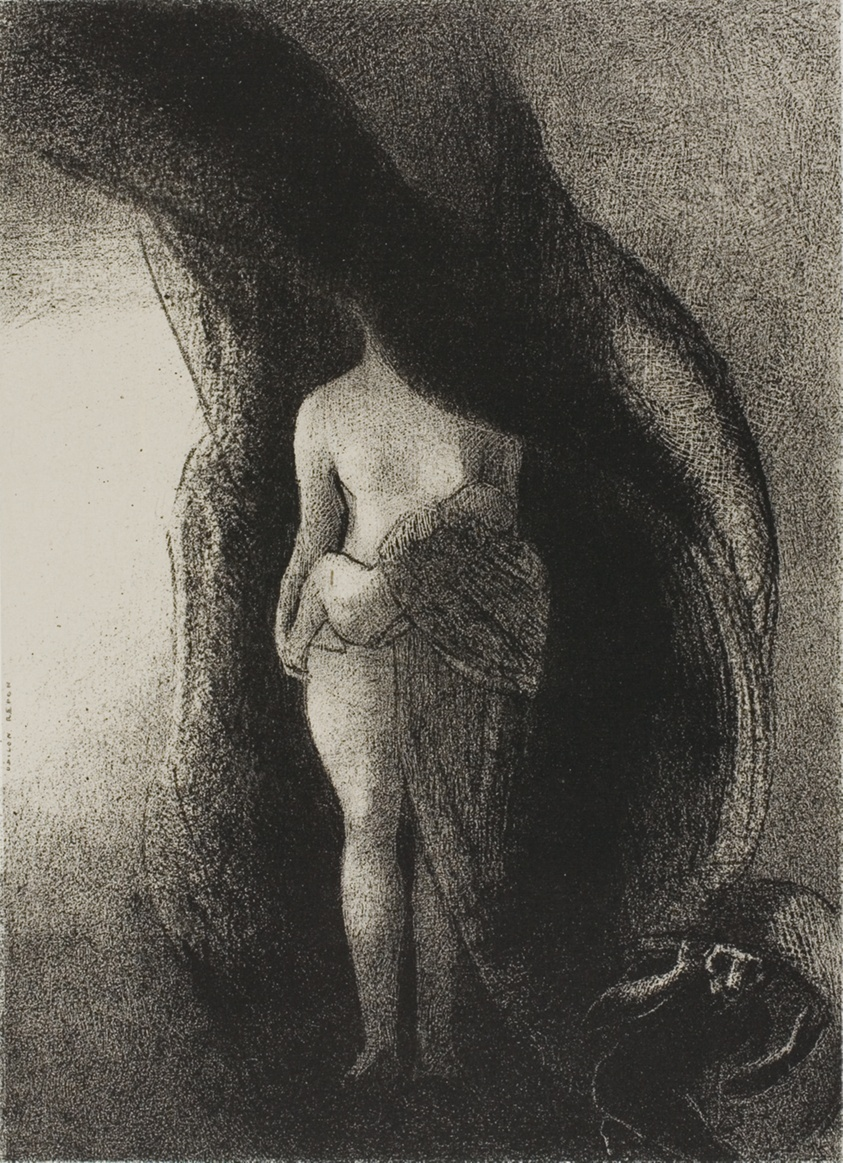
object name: Print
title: I am Still the Great Isis! Nobody Has Ever Yet Lifted My Veil!, plate 16 of 24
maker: Odilon Redon (French, 1840-1916)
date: 1896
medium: Lithograph in black on light gray China paper laid down on ivory wove paper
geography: France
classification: lithograph; print; prints and drawing; paper